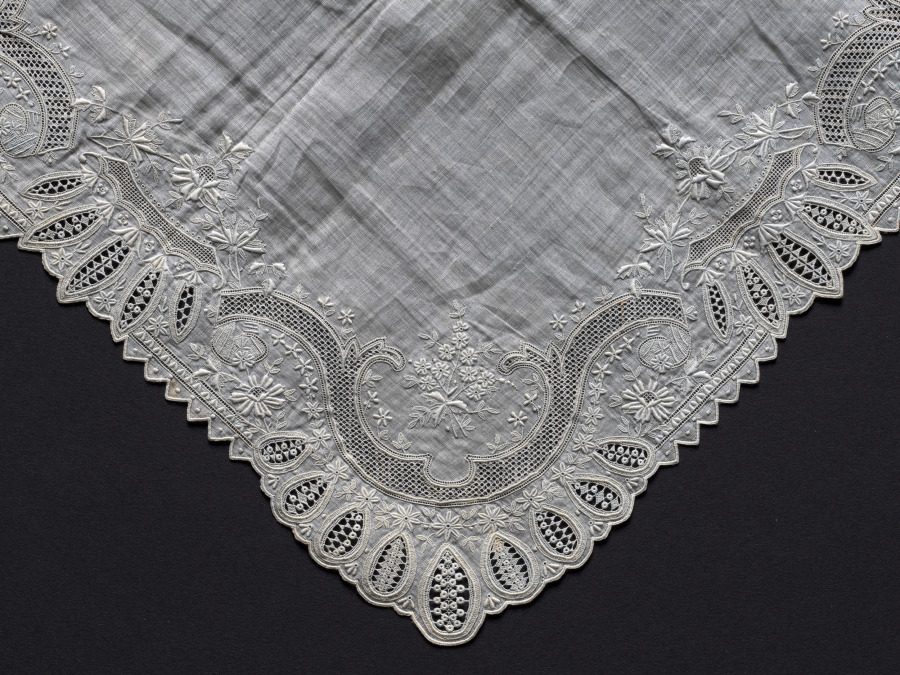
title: Lace Handkerchief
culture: Switzerland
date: 1800s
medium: Plain weave linen: needle lace (drawnwork) and embroidery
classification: Embroidery